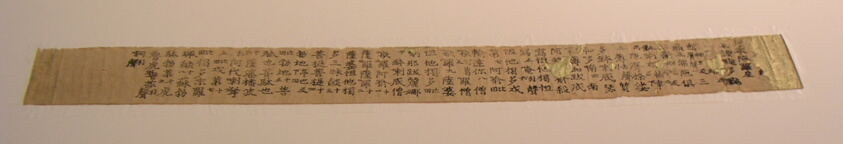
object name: Drawing and Watercolor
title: Reliquary and Printed Konpon Darani Text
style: Japanese (culture or style)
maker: Artist unknown; Japan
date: Nara period (710–794), c. 770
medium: Wood with traces of white slip; ink on paper with gold repairs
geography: Japan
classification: reliquary; calligraphy; wood; shrine; asian art